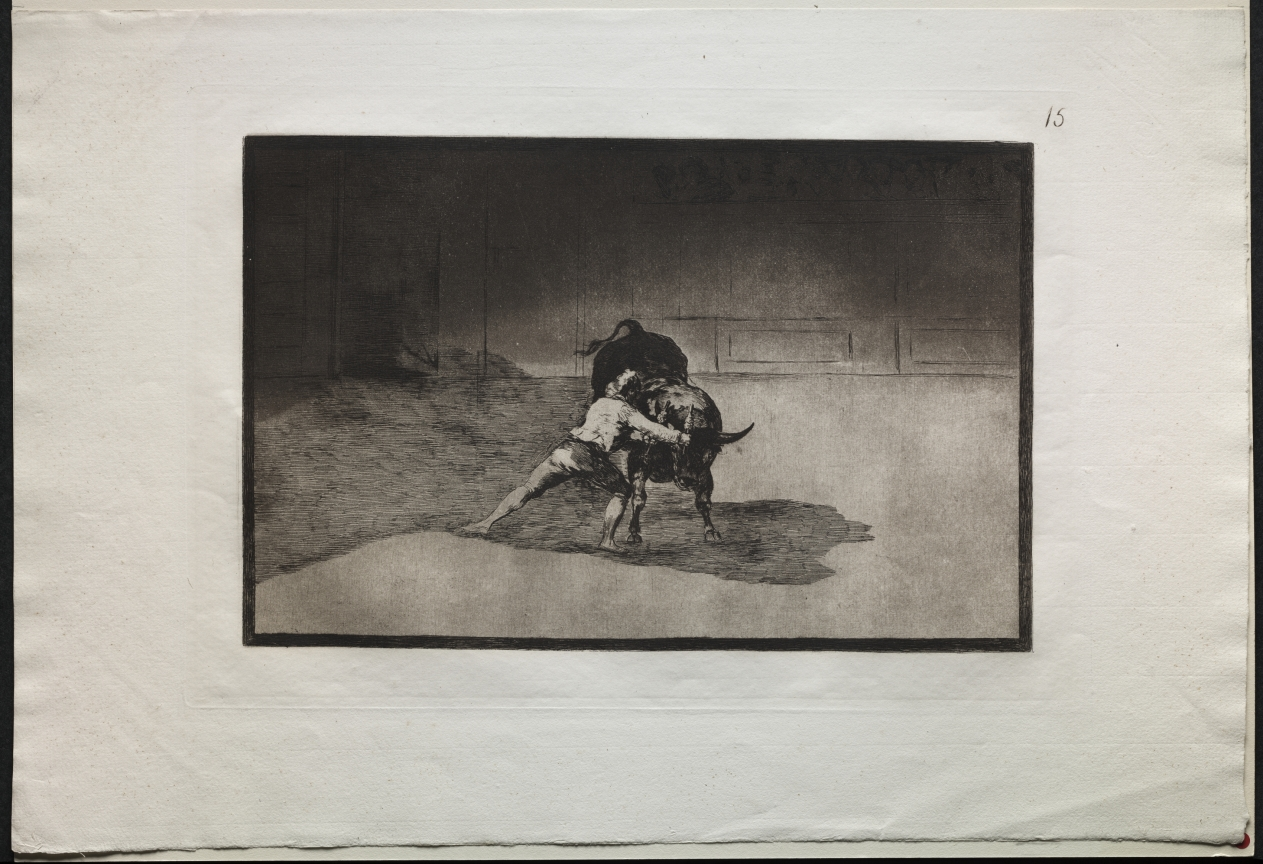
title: Bullfights: The Famous Martincho Places the Banderillas Playing the Bull with the Movement of his Body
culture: Spain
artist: Francisco de Goya (Spanish, 1746–1828)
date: 1816, printed 1876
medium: engraving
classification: Print